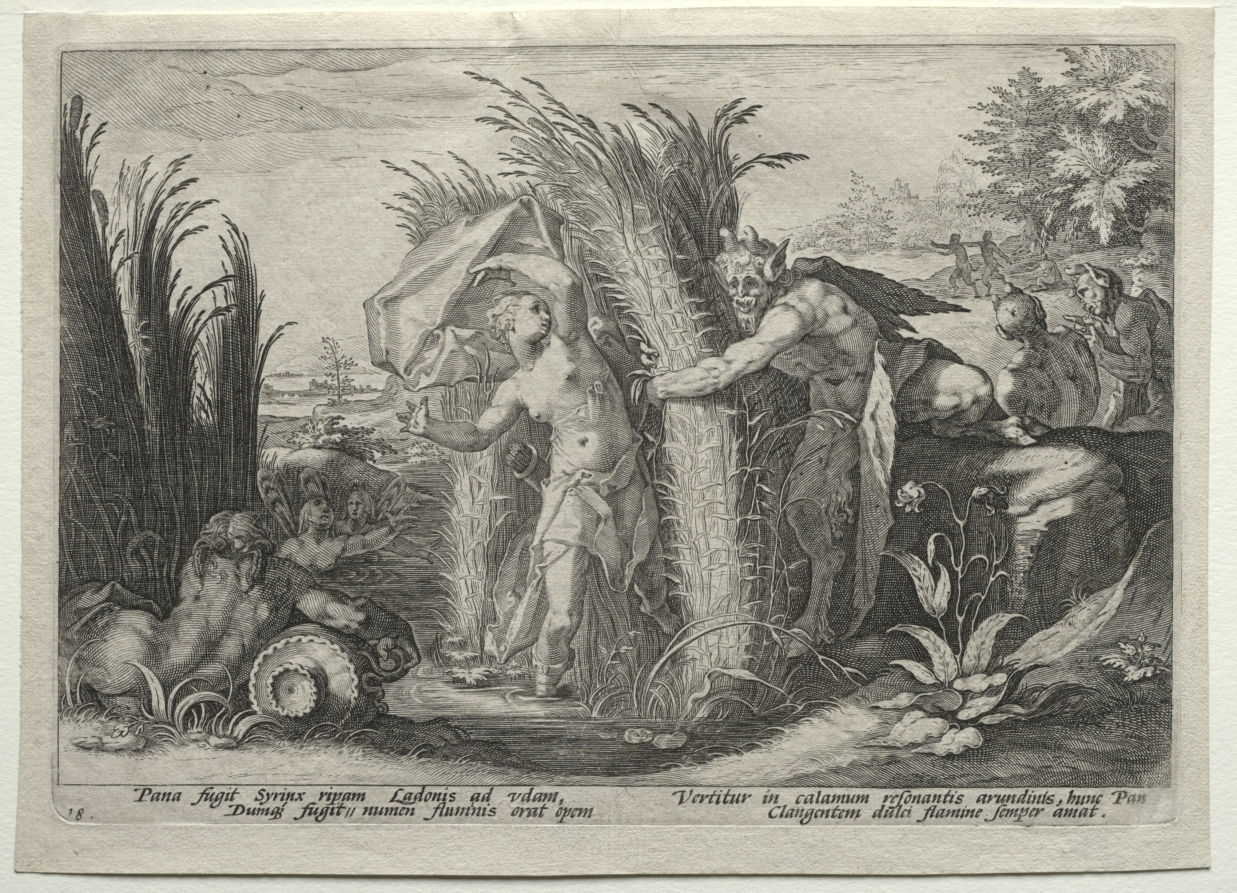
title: Pan Pursuing Syrinx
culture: Netherlands, 16th century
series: The Creations of the Four Elements (from Ovid's Metamorphoses)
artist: after Hendrick Goltzius (Dutch, 1558–1617)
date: c. 1589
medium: engraving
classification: Print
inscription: in plate, across bottom: Pana fugit Syrinx ripam Ladonis and udam, / Dumque fugit ll numen fluminis orat opem / Vertitur in calamum resonatis arundinis, hunc Pan / Clangentem dulci flamine semper amat. ; lower left, in plate: 18 ; VERSO, lower left, in graphite (various numbers): 18. / B.IV.48 / 080 / 90925 381 ; lower left, in graphite: Goltzius Engraving ; lower center, in graphite: DT-279 ; lower right, in graphite: T 4a